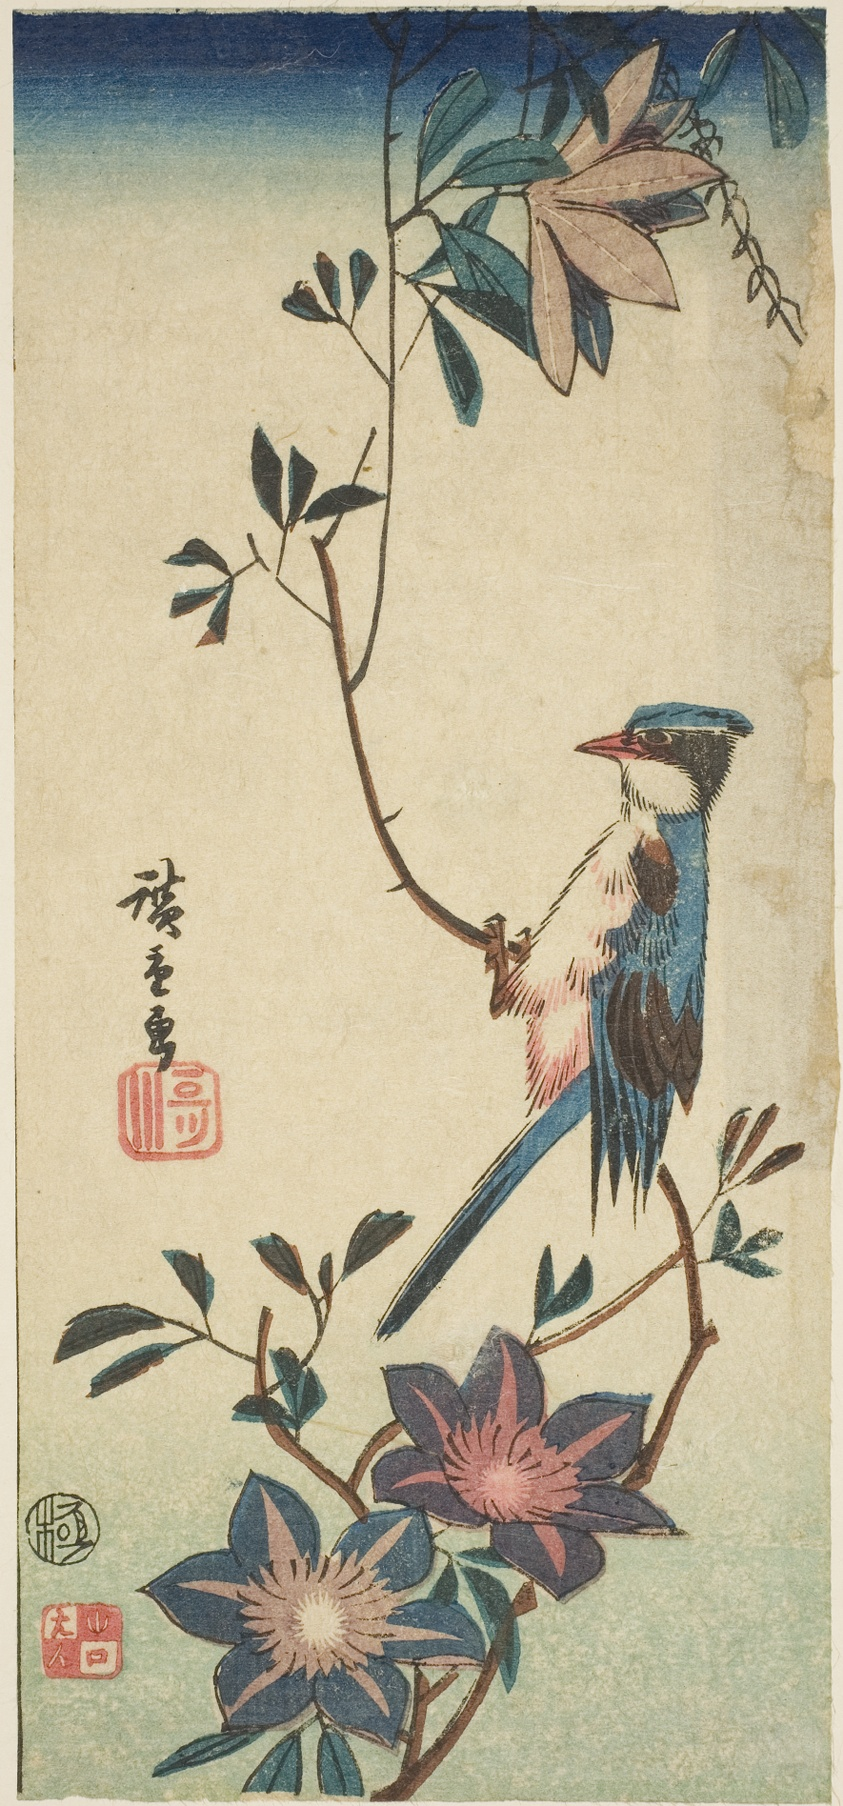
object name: Print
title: Blue bird on clematis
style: Japanese (culture or style)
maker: Utagawa Hiroshige 歌川 広重; Japanese, 1797-1858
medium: Color woodblock print; sanchogake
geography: Japan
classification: woodblock print; print; asian art